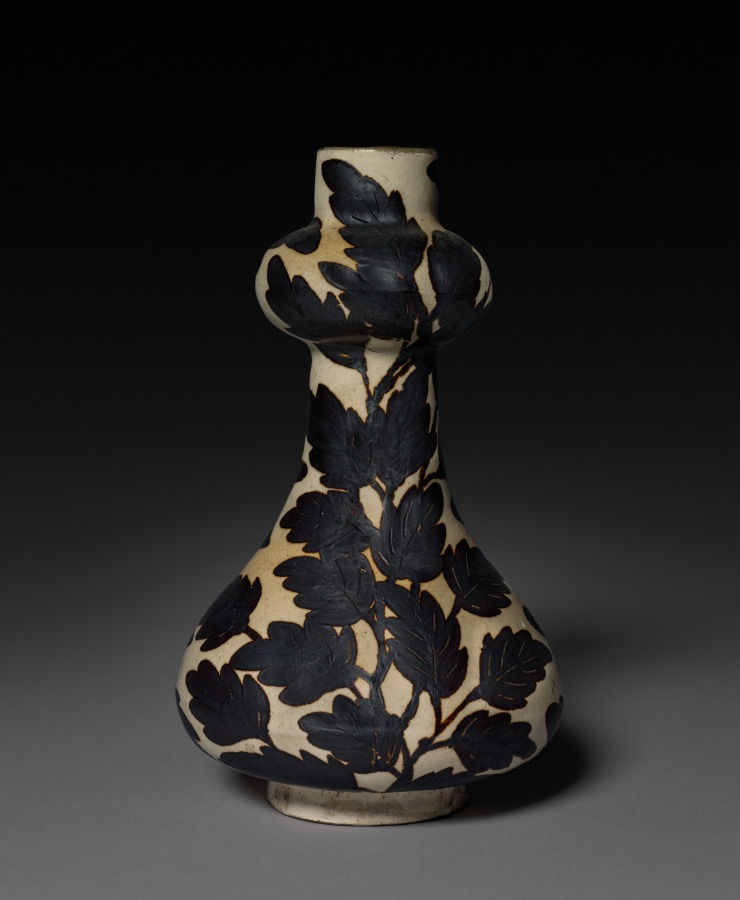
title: Gourd-shaped Vase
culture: China, Ming dynasty (1368–1644)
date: 1368–1644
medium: porcelain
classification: Ceramic